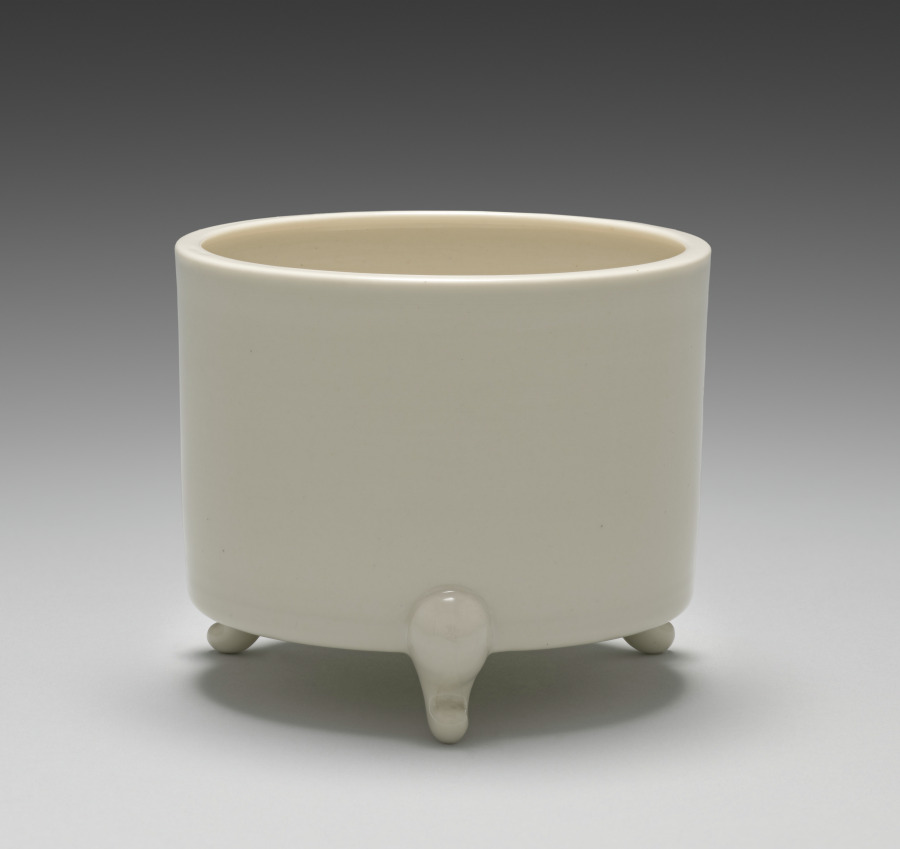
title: Incense Burner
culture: Japan, Meiji period (1868–1912)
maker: Seifū Yohei III (Japanese, 1851–1914)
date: 1893–1914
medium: Porcelain with creamy white glaze and molded design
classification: Ceramic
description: Yohei III made incense burners in a wide variety of designs and styles. The body and glaze of this one are taihakuji, or “great white porcelain,” an important early invention Yohei III devised in 1872 that involved the combination of a distinctive translucent, creamy glaze over an ivory-colored clay body. The burner has rounded, cabriole legs, resembling tiny table legs, attached to the exterior. Lids were produced outside the studio by metalwork specialists. For this incense burner, they created a floral-patterned silver lid.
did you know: There is the faintest decorative band around the bottom of the incense burner.